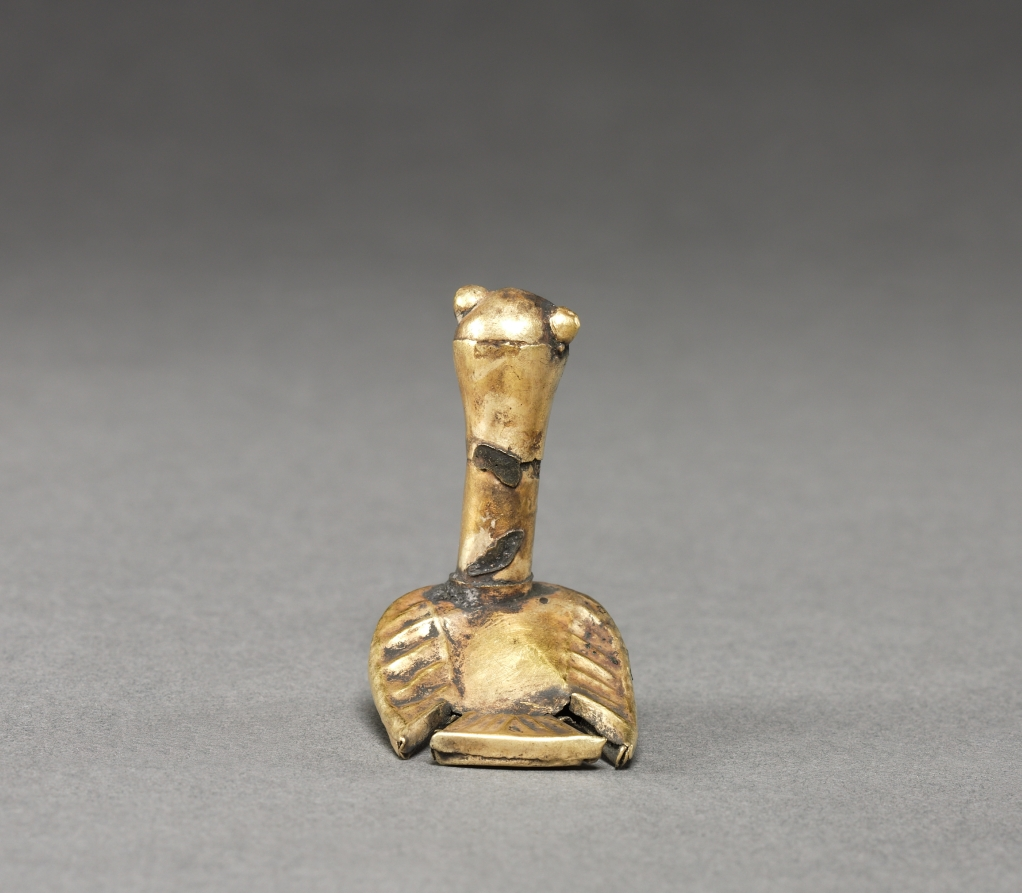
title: Bird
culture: Peru, North Coast, Chimú Culture, 13th-15th century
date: 1200s-1400s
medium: bronze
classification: Metalwork